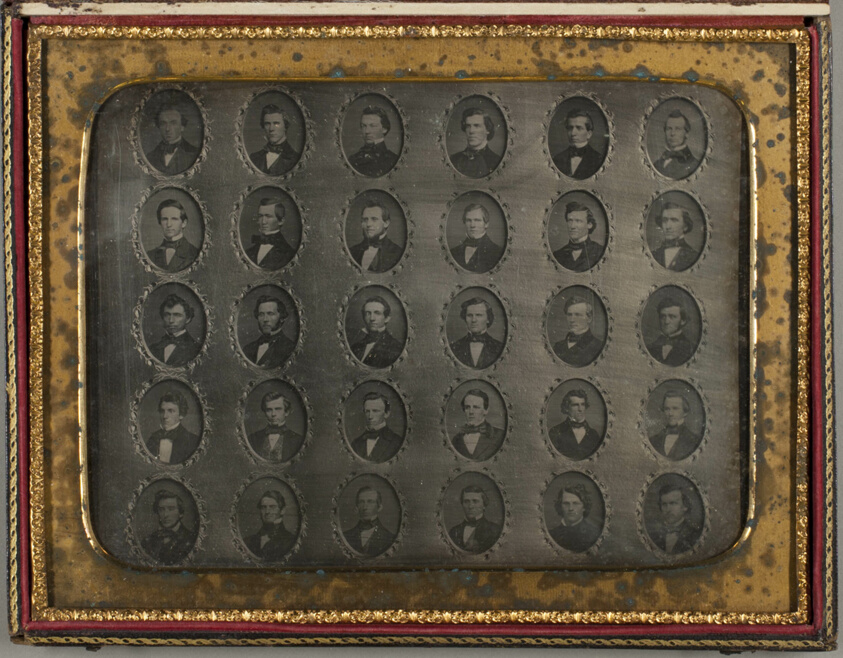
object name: Photograph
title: Untitled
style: 19th century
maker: Artist unknown (American, 19th century)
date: c. 1852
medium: Daguerreotype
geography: United States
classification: photograph; daguerreotype; photography